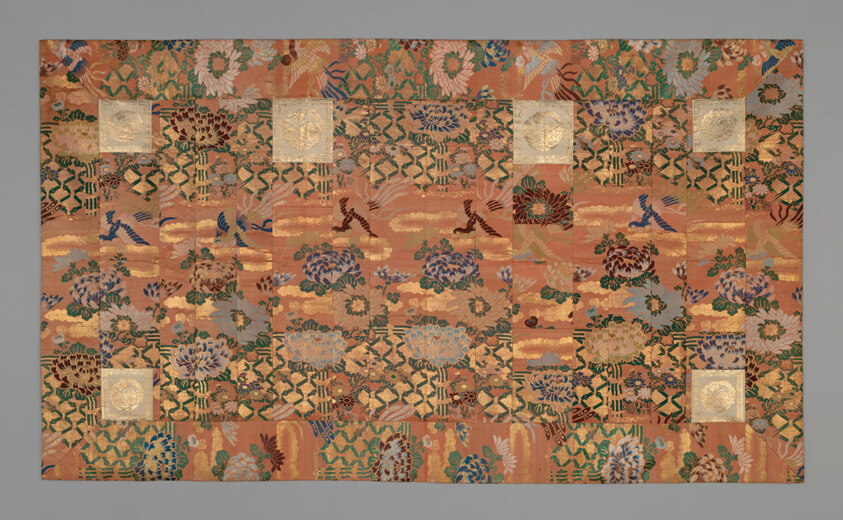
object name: Textile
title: Kesa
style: meiji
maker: Japan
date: Meiji period (1868–1912), late 19th century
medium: Silk and gold-leaf-over-lacquered-paper strip, warp-float faced 2:1 'Z' twill weave with weft-float faced 1:2 'S' twill interlacings of secondary binding warps and supplementary patterning wefts; lining: 5:1 twill damask weave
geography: Japan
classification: textile; liturgical - buddhist; costume; weaving